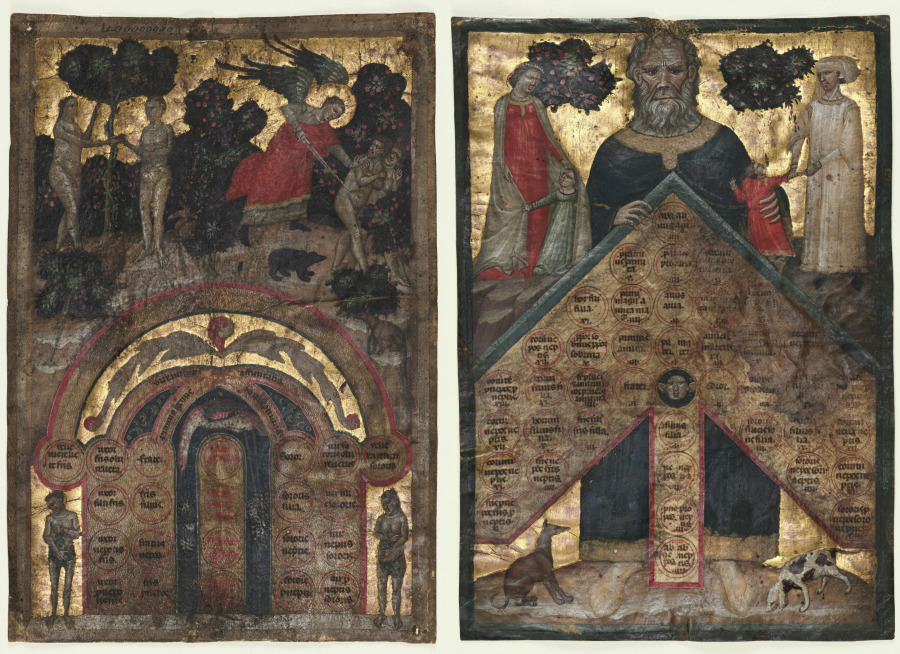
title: Leaves from a Volume of Johannes Andrea's "Lectura super arboris consanguinitatis et affinitatis: Table of Affinity and Table of Consanguinity"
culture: Italy, Bologna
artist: Master of the Register of 1328 (Italian)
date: c. 1331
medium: ink, tempera and gold on vellum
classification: Manuscript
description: The two leaves shown here come from Iohannes Andrea's widely circulated treatise on marriage impediments. The writer lived until 1348 and is known as the most learned of the lay canonists of the Middle Ages. He taught for nearly fifty years at the University of Bologna, where his lectures on both canon and Roman law made him famous.